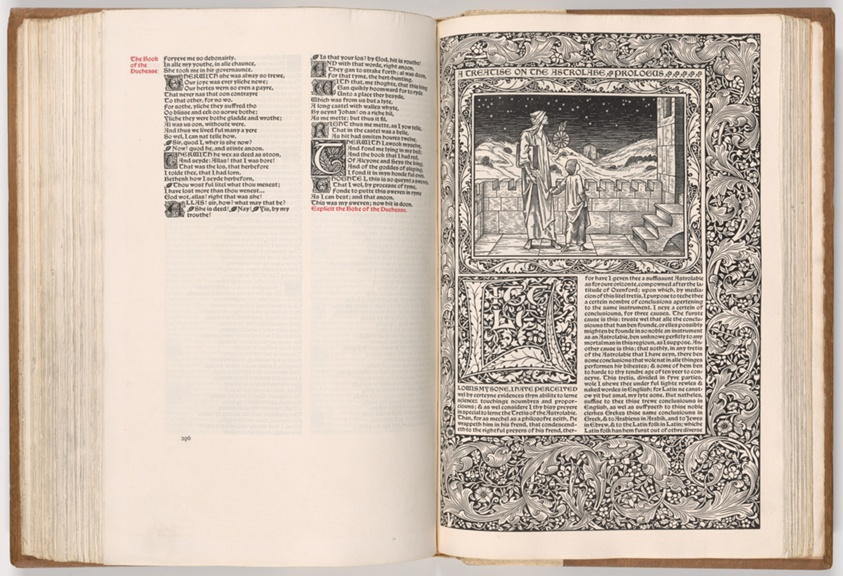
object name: Book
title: The Works of Geoffrey Chaucer Now Newly Imprinted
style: Arts and Crafts Movement, 19th century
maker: William Morris (English, 1834–1896); Illustrated by Sir Edward Burne-Jones (English, 1833-1898); Engraved by William Harcourt Hooper (English, 1834-1912)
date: 1896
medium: Hand-printed book on Batchelor linen paper, bound with tooled white pigskin on oak board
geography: England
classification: book; ink on paper